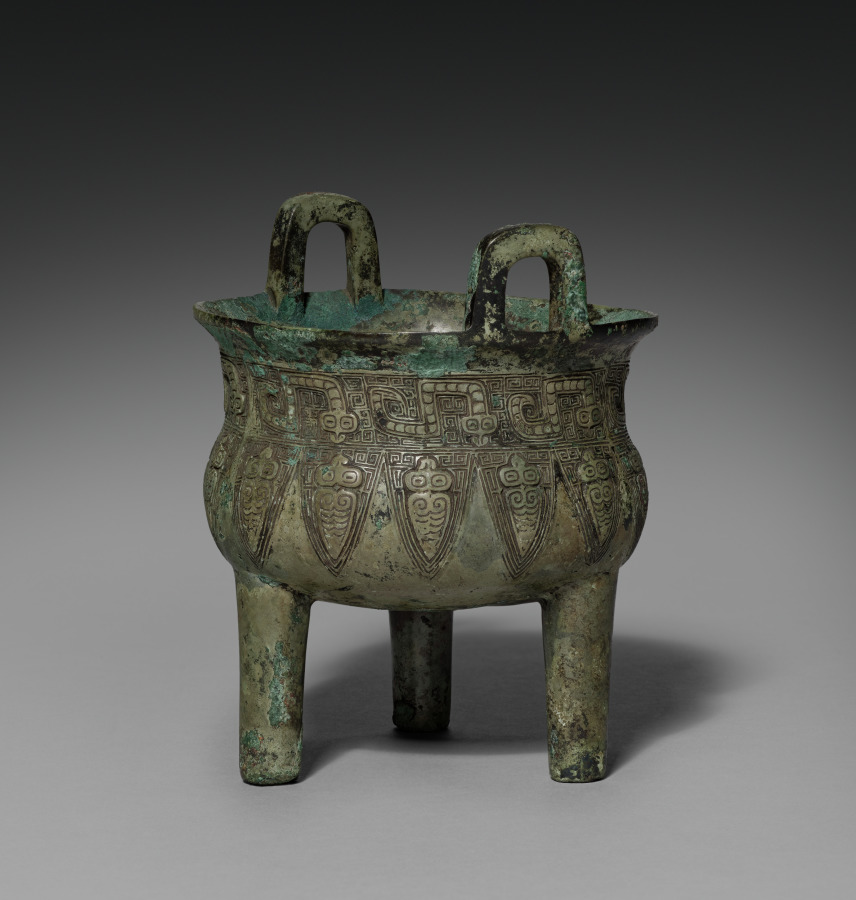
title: Tripod Cauldron (Ding)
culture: China, Shang dynasty (c. 1600–c. 1046 BCE)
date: 1200–1100 BCE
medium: bronze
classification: Metalwork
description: In ancient China, bronze tripods of the type called ding were made in sets of different sizes to be used in rituals in which grain and meat was offered to the spirits of the ancestors. These bronzes were subsequently both collected items and major scholarly preoccupations in Chinese history. They were prized art treasures that provide source materials for Chinese historiography and antiquity studies. Catalogues of archaic bronzes have been published since the Song dynasty. Scholars studied the bronze inscriptions, typologies, and terminologies, and these studies exerted an impact in the field well before the birth of modern art history and archaeology.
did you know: The vessel shows a band of silkworms and cicadas in two registers.